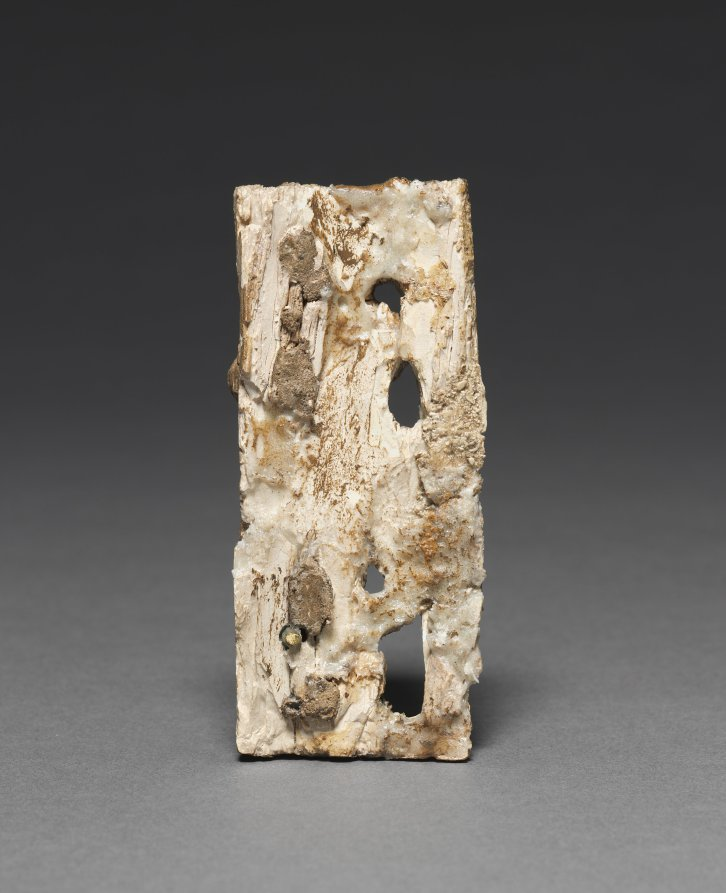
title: Young Woman with a Spear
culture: Afghanistan, Begram, Kushan period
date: c. 50–200 CE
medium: ivory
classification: Ivory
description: This smiling female figure has her hair tied up to one side, wound around with an embroidered strip of cloth. She stands akimbo with her upper garment removed and tied in a loose looped knot at her side. A broad girdle holds up her clinging, diaphanous skirt. She has the ideal female form of a young mother, and since she holds a spear, she may have served a protective function.